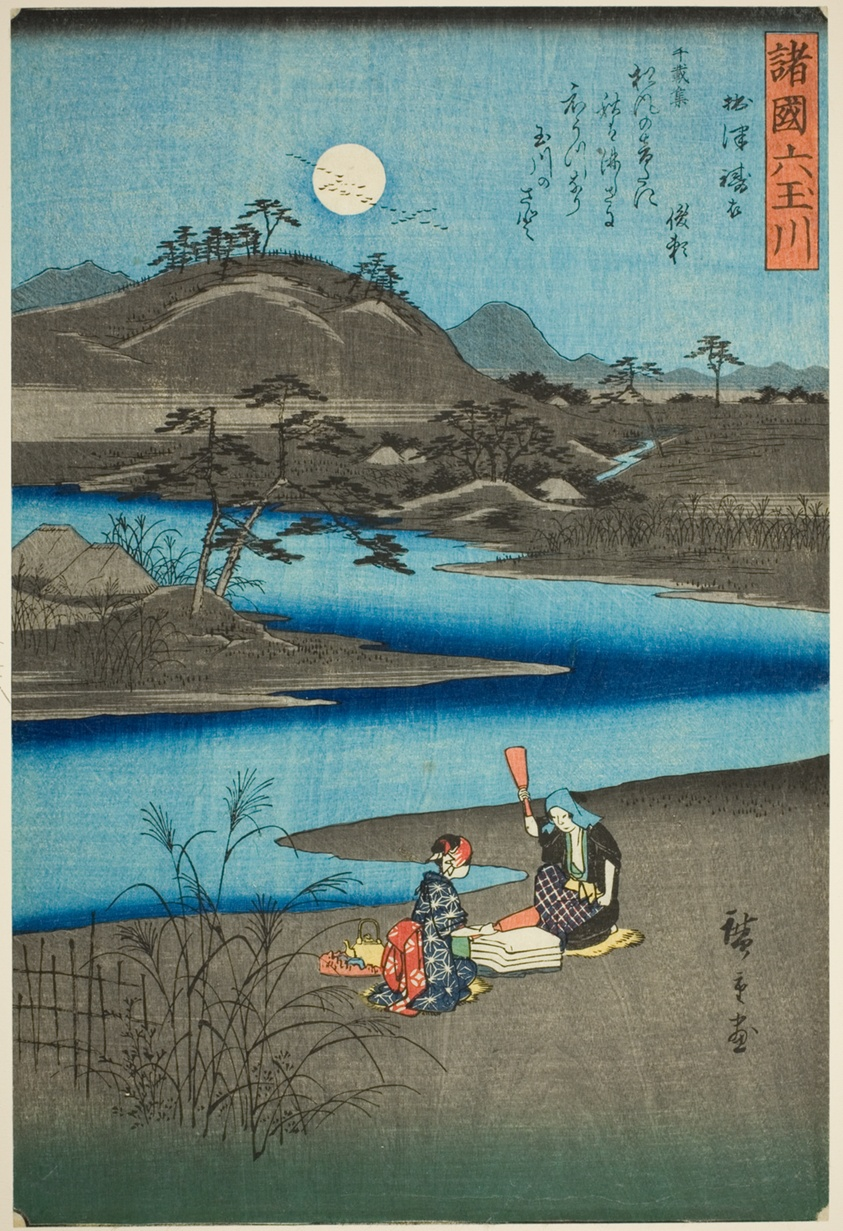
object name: Print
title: The Kinuta Jewel River in Settsu Province (Settsu Kinuta), from the series "Six Jewel Rivers in the Various Provinces (Shokoku Mu Tamagawa)"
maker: Utagawa Hiroshige 歌川 広重; Japanese, 1797-1858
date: 1857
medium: Color woodblock print; oban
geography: Japan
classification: woodblock print; print; asian art